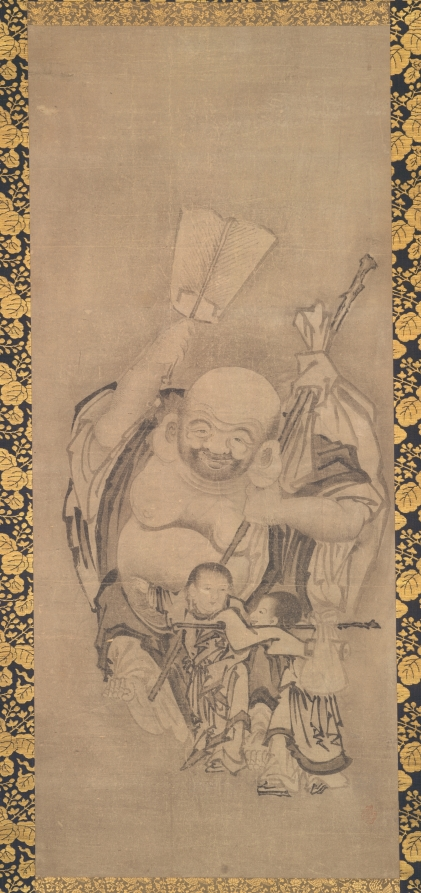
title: Hotei with Daoist Immortals: Hotei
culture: Japan, Edo period (1615–1868)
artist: Kyūseki Tomonobu (Japanese, 1653–1721)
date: late 1600s-early 1700s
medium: triptych of hanging scrolls: ink on paper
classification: Painting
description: Hotei was a Chan (Japanese: Zen) monk living in China during the 900s who, in the 1300s, became a legendary figure in Japan. At that time a popular cult praising him sprang up, extending beyond Zen to other religious communities. This rare triptych embraces a central Zen icon with flanking Daoist images, thereby suggesting the compatibility-rather than the exclusivity-of these two creeds. Hotei also enjoys popularity in Japan as a kind of genre, or folk figure, which explains his mirthful expression in Japanese paintings. The Daoist figures in contrast appear eccentric and foreign-looking, in keeping with Daoist lore. When these paintings came to the museum their appearance was compromised by poor quality textile mountings, and cracked paper surfaces deserving of restoration. The fact that these scrolls constituted an integral set that properly had to be shown as a unit heightened the need to stabilize their condition and improve their presentation for museum visitors. A complete remounting of each scroll occurred following the cleaning of the paper surfaces and the repair of the lifting surface areas. No inpainting was done, thereby preserving the original ink values and brushstrokes.